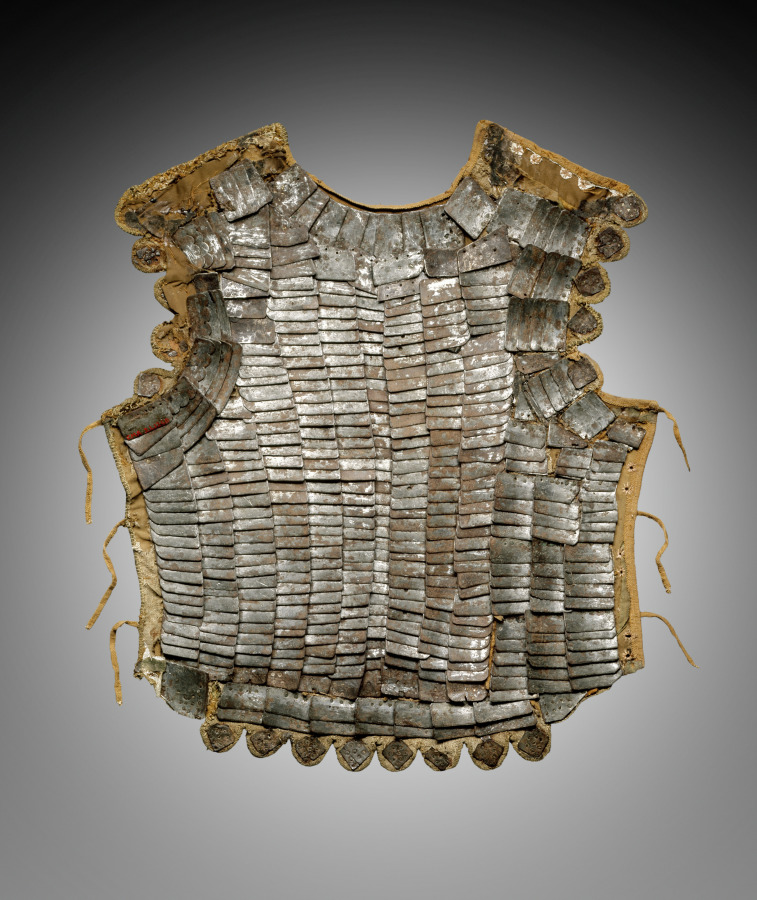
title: Body Guard (Brigandine)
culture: Italy (?), early 16th Century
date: c. 1500–1525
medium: linen; gold velvet; steel; brass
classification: Arms and Armor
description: The brigandine is a light, vest-like body defense popular with both knights and infantry from the 1400s through about 1550. It is constructed of multiple small plates attached to a cloth covering. Finer examples, like this one, are faced in velvet or fabric made of gold thread. The lightweight brigandine provided protection from the weather, and was extremely flexible.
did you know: This vest only weighs about five and a half pounds, considerably lighter than plate armor.